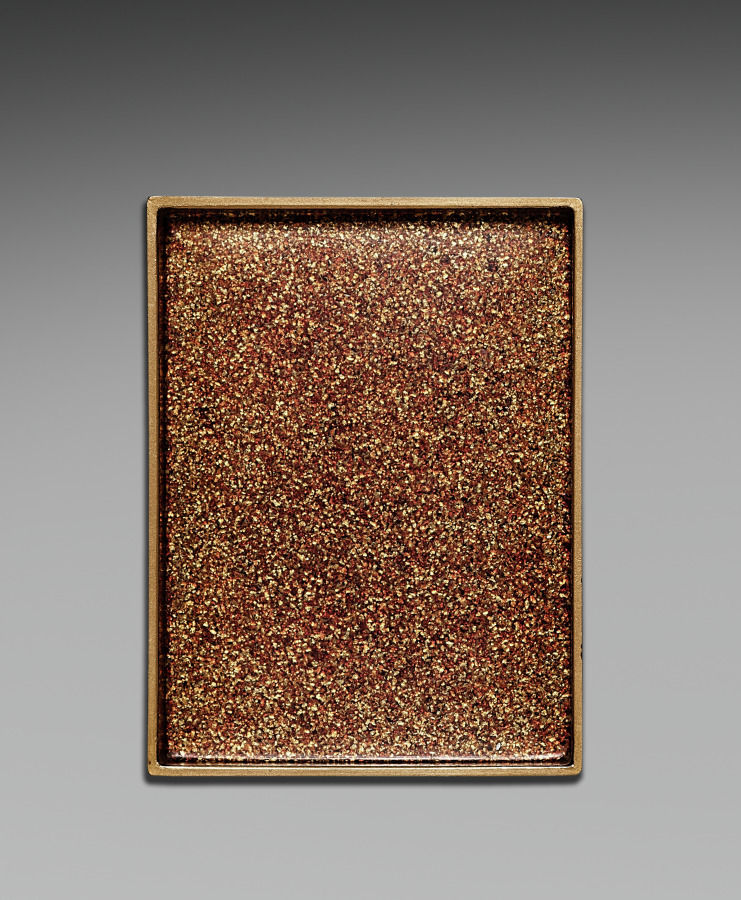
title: Nested Boxes with Chrysanthemums (inner box lid)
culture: Japan, Meiji period (1868–1912)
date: early 1900s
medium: lacquer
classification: Lacquer